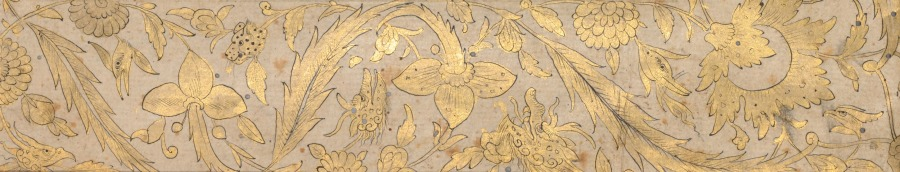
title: An Illuminated Folio from the Royal Manuscript of the Farhang-i Jahangiri (verso)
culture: Mughal India, court of Jahangir (1605–1627)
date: 1607–8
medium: Gum tempera, ink, and gold on paper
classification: Painting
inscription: Verso: “Gur” (name of a people in India) to “Gush” (morning east breeze, zephyr)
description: Farhang-i Jahāngīrī, one of the most complete and authoritative dictionaries of the Persian language, was compiled by Mir Jamal al-Din Husayn Inju. It took him 12 years to compile over 9,000 words with definitions and examples from verses by Persian poets. He was born in Shiraz, Iran, but lived most of his life in Agra, India, so the dictionary was named honor of the Mughal emperor Jahangir, who reigned from 1605 to 1627.